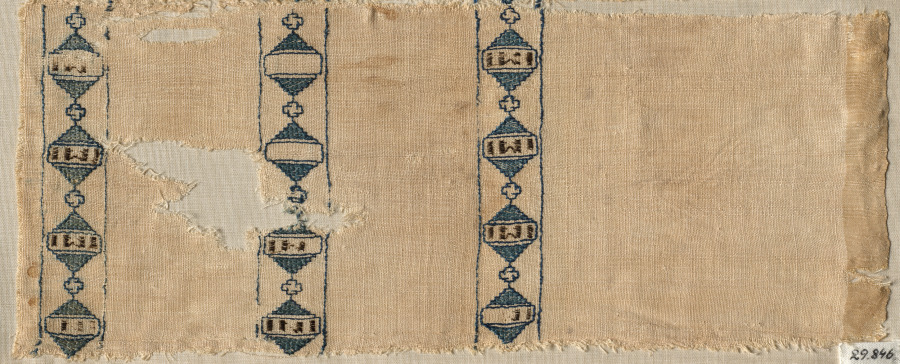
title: Two Fragments of a Scarf or Headdress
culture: Egypt, Mamluk sultanate (1250–1517)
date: 1300s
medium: silk embroidery on linen tabby ground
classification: Embroidery